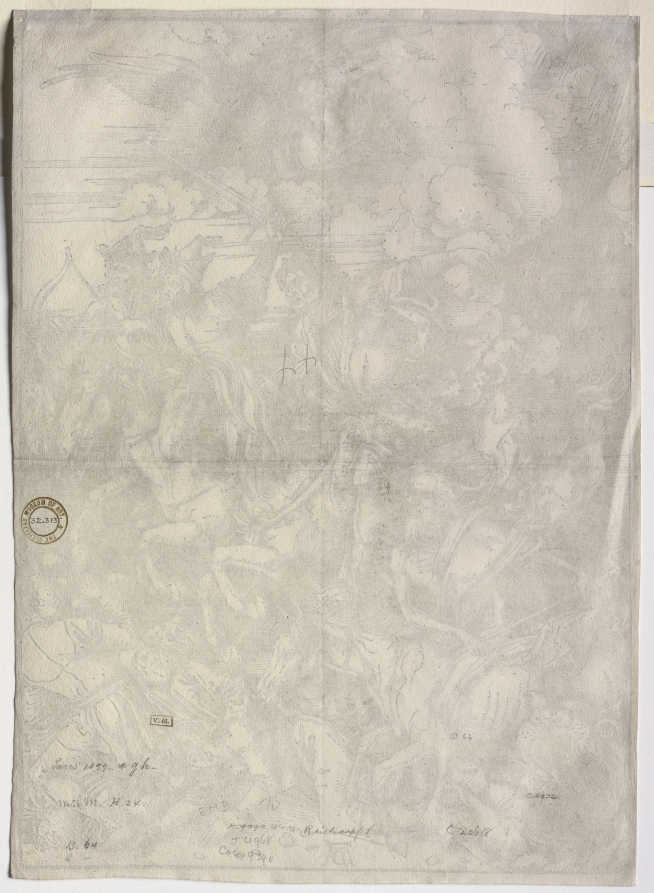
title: The Four Horsemen, from The Apocalypse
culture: Germany, late 15th-early 16th Century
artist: Albrecht Dürer (German, 1471–1528)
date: c. 1498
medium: woodcut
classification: Print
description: In 1498 Dürer published a book illustrating the Revelation of John or the Apocalypse of John, the last book of the New Testament. The images were unique in their large scale, breadth of concept, and unity of design. The first book to be both published and illustrated by the artist, it comprised a title page and 15 full-sheet woodcuts featuring text on the verso of all the sheets except the last one. Often visible through the paper, the text mars the image on the recto of the sheet. The finest impressions were most often printed without text, like this one of The Four Horsemen. Here, Dürer suggested the vigorous momentum of the horsemen through the windblown clothing of the riders, the windswept clouds, and the figures trampled beneath the hooves of the approaching horses.